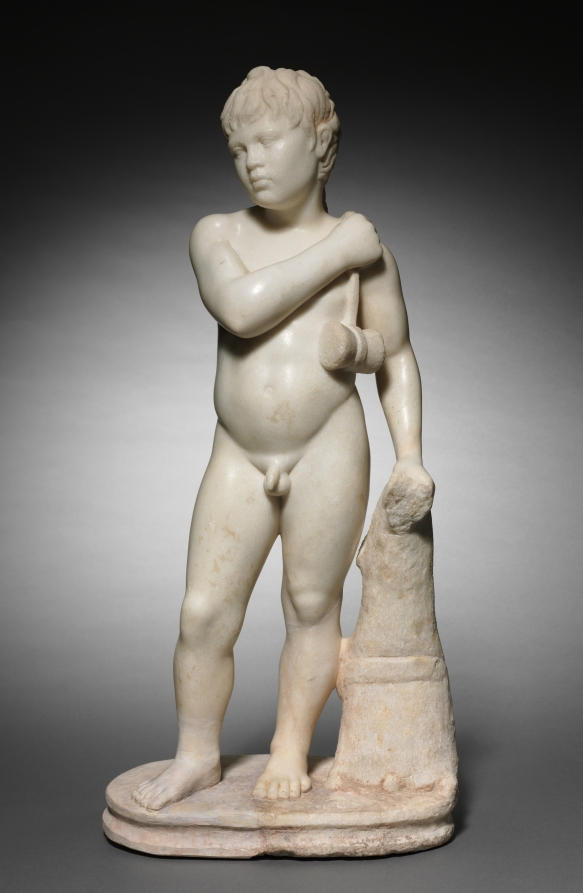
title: Youth with Jumping Weights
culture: Italy, Rome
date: c. 40–70 CE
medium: marble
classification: Sculpture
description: The hourglass-shaped jumping weights slung over his shoulder, together with the animal-skin punching bag on which he leans, characterize this youth as an athlete. The distinctive haircut, short with one long tress in back, may indicate a childhood vow, perhaps to be trimmed in a future ceremony. Several very similar sculptures exist in other collections, suggesting the existence of a single prototype, now lost.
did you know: The lower right leg and foot of this sculpture do not survive, and have been reconstructed.